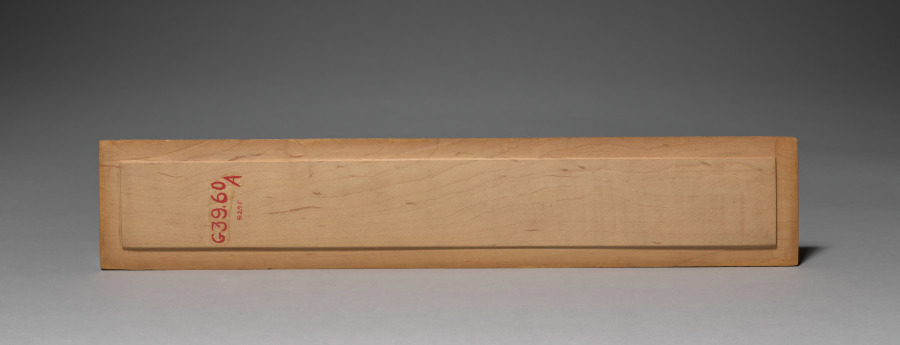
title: Train Car Coupler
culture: Denmark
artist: Boysen Toys (Danish)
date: 1900s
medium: wood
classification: Wood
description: Credit line: John D. Rockefeller General Education Board Grant II